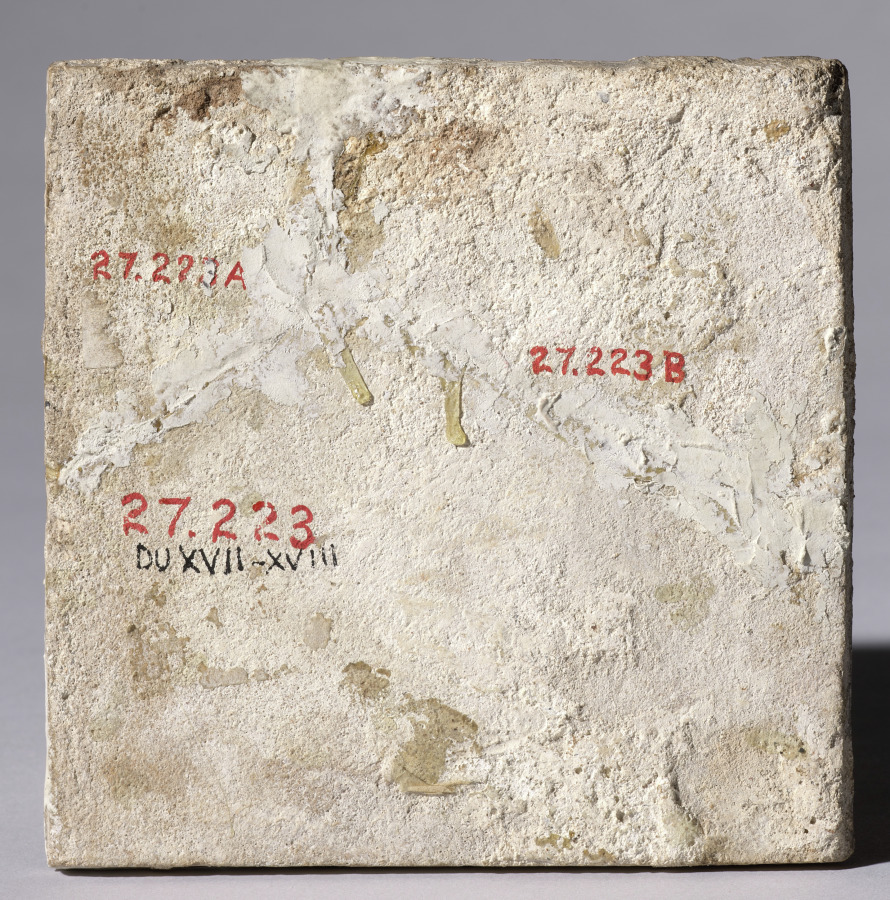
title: Tile–New Testament Scene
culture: Netherlands, Holland, Delft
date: c. 1600s–1700s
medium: glazed ceramic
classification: Ceramic